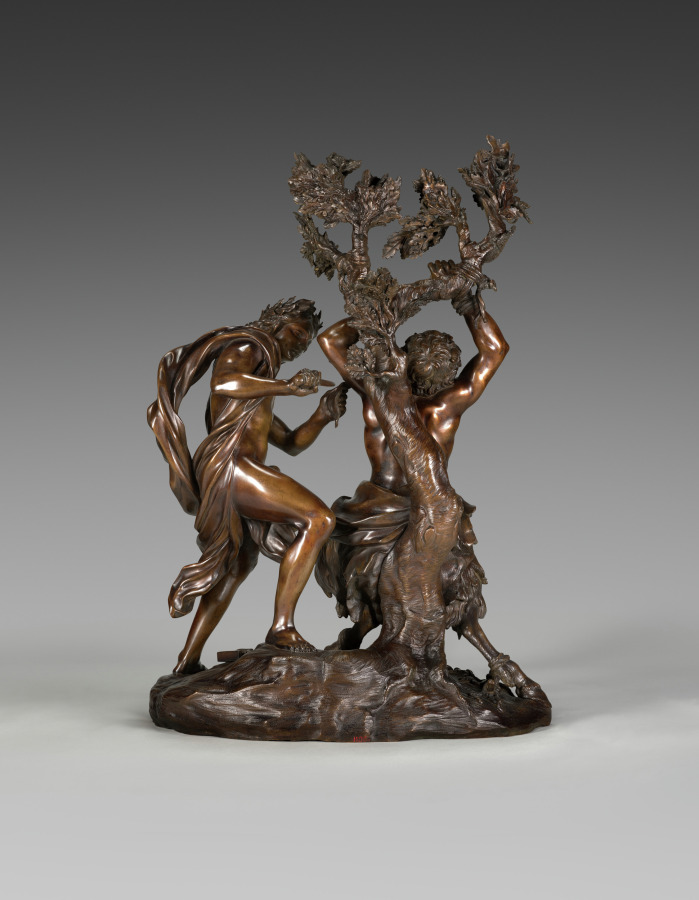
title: Apollo Flaying Marsyas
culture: Italy, Florence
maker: Giovanni Battista Foggini (Italian, 1652–1725)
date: c. 1691–1700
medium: Bronze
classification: Sculpture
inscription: 1136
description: According to myth, the overconfident satyr (half-goat, half-man) Marsyas challenged Apollo, god of the arts, to a musical duel. The defeated Marsyas was tied to a tree and skinned alive in punishment for his pride. Foggini’s bronze captures the moment after Apollo’s victory as the bound Marsyas cries out in agony while the god makes the first incision. The satyr’s anguish is echoed by the gnarled branches; Apollo’s wrath is manifested in his billowing drapery.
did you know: The lyre with which Apollo outperformed Marsyas can be seen between his feet, cast down upon his victory.